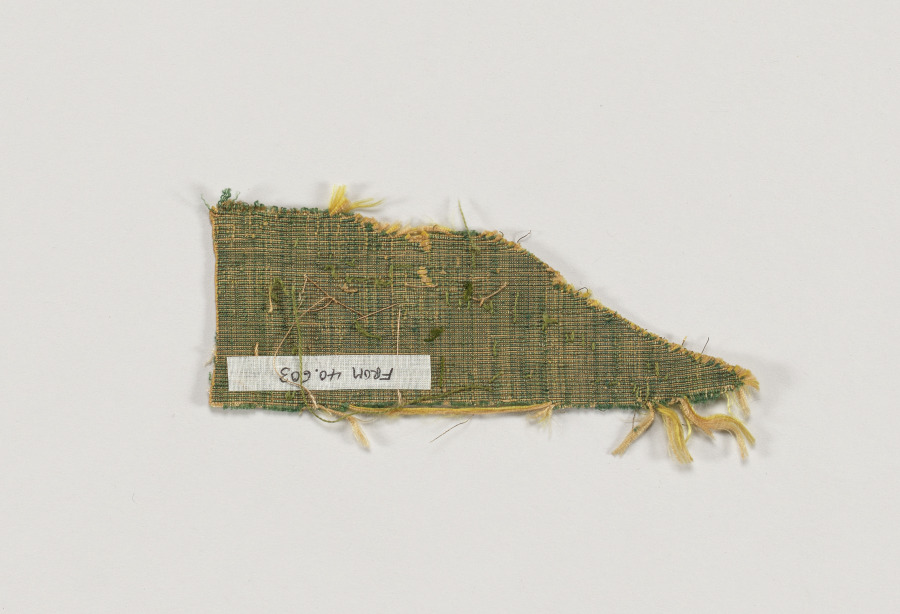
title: Velvet Fragments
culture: Spain, early 16th century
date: early 16th century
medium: velvet (cut, voided, and brocaded): silk and gold thread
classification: Velvet